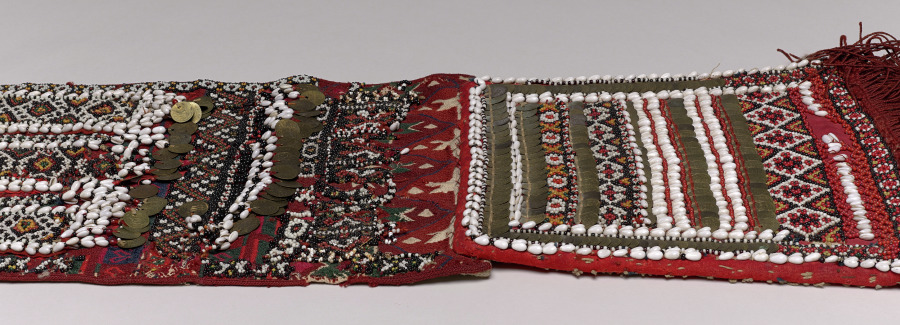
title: Headdress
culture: probably southeastern Europe, Balkans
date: 1800s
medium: Linen, shells, glass beads, metal coins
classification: Garment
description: This long, colorful headdress would hang over the head and down a woman's back. It consists of several panels of linen sewn together, and densely embroidered with silk thread. On the middle panel, small black, red, white, yellow, and red beads are stitched to create geometric designs. Double rows of small cowrie shells outline them, and metal coins with a crescent moon motif also feature in the decoration. These are first punctured, then stitched onto the textile. The lowermost edge is finished with a red fringe.